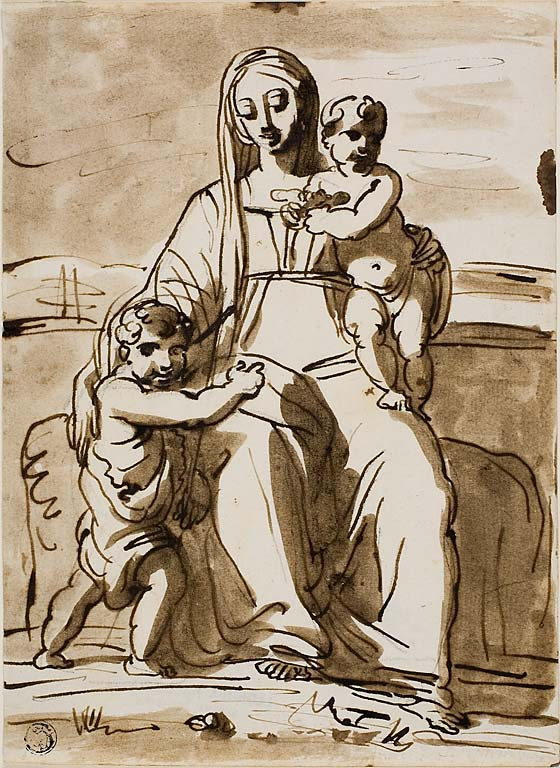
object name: Drawing and Watercolor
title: Madonna and Child with Saint John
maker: Attributed to Fortunato Duranti (Italian, 1787-1863); or Giovanni Battista Tiepolo (Italian, 1696-1770)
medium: Pen and brown ink, with brush and brown wash, over black chalk, on cream laid paper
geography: Italy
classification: pen and ink drawings; drawings (visual works); prints and drawing